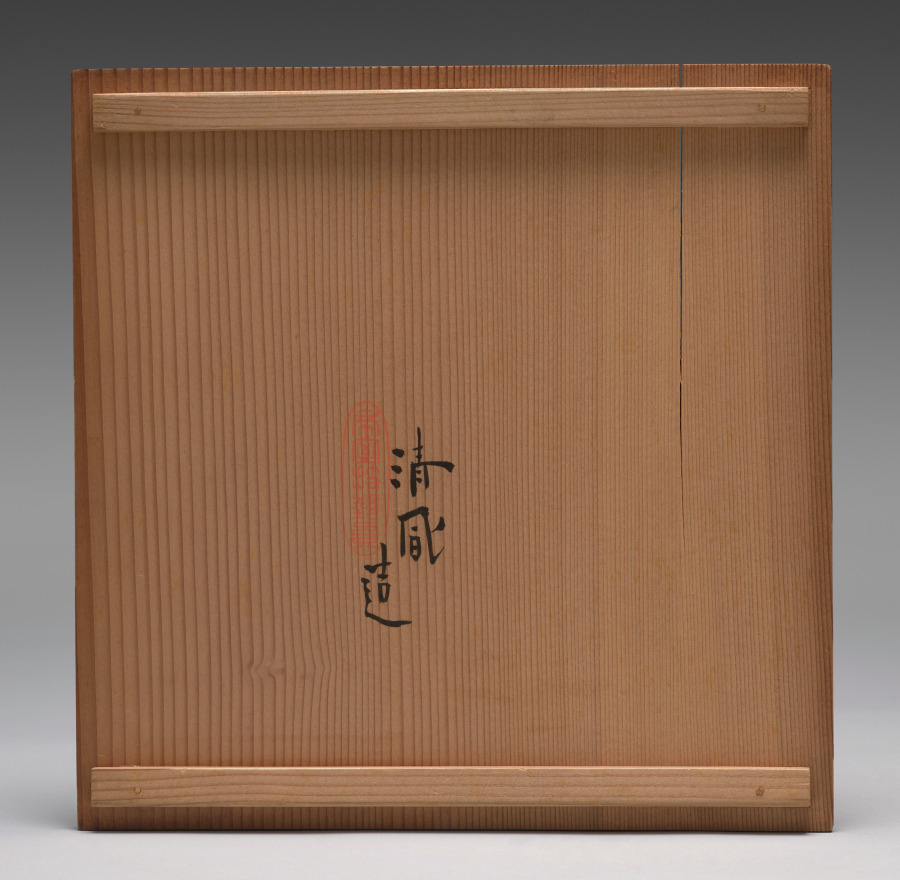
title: High-Footed Bowl with Lotus Pond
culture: Japan, Meiji period (1868–1912)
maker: Seifū Yohei III (Japanese, 1851–1914)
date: 1887–92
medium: Porcelain with underglaze color and modeled designs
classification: Ceramic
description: Seifū Yohei III was the most prominent head of a ceramics studio in Kyoto that specialized in Chinese-style porcelains and especially items for use in sencha (煎茶), or the drinking of steeped-leaf tea with companions. Sencha was popular among the bunjin of Kyoto and Osaka, who often enjoyed it as part of their emulation of Chinese culture. While sencha was by design less formal than the Japanese tea ceremony, it still featured the display of treasured objects. Prized Chinese antiquities were generally unobtainable, so substitutes such as the Gu-Shaped Flower Vase, CMA 2022.224, were much in demand. Bowls for distributing sweets, like this one, were also a staple of sencha gatherings.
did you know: This high-footed bowl simulates exploration of a pond both from underwater and from the sky.